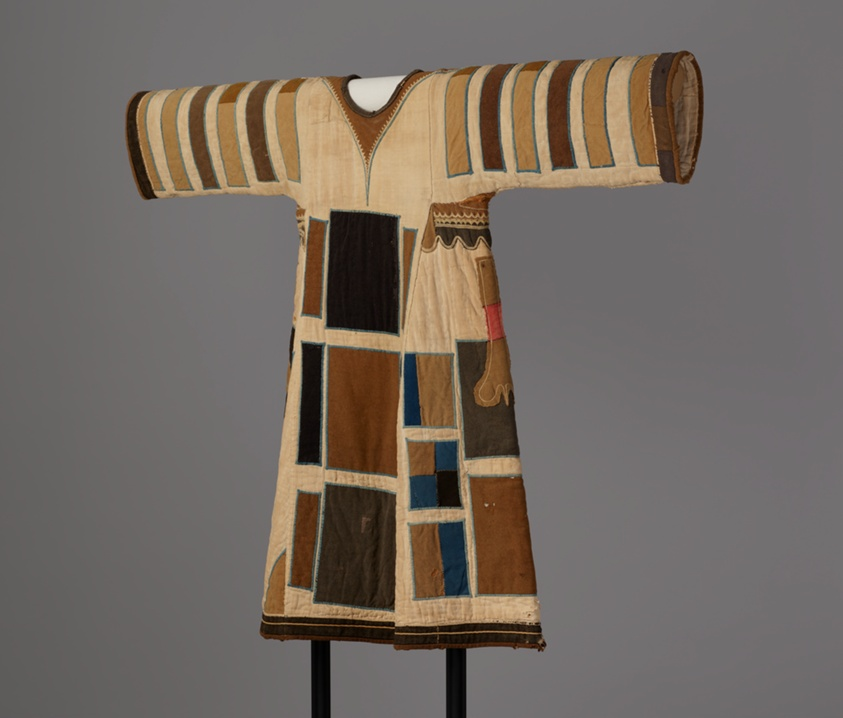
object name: Costume and Accessories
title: Tunic (Jibbeh)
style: Arts of Africa, 19th century, east african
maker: Mahdiyya State, Sudan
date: 1885/99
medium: Layers of cotton, plain weave; pieced and quilted; appliquéd with wool and wool and cotton plain weaves and wool twill weaves; embroidered with cotton in chain, cross, and a derivative of herringbone stitches; applied plied yarn edging; lined with cotton plain weaves; pieced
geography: Sudan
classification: tunic; arts of Africa; costume; garment; textile; dress (garment)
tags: garment, rectangles, black (color), tan (color), brown (color), lines, colonialism, Freedom, military, military uniforms, soldiers, uniforms